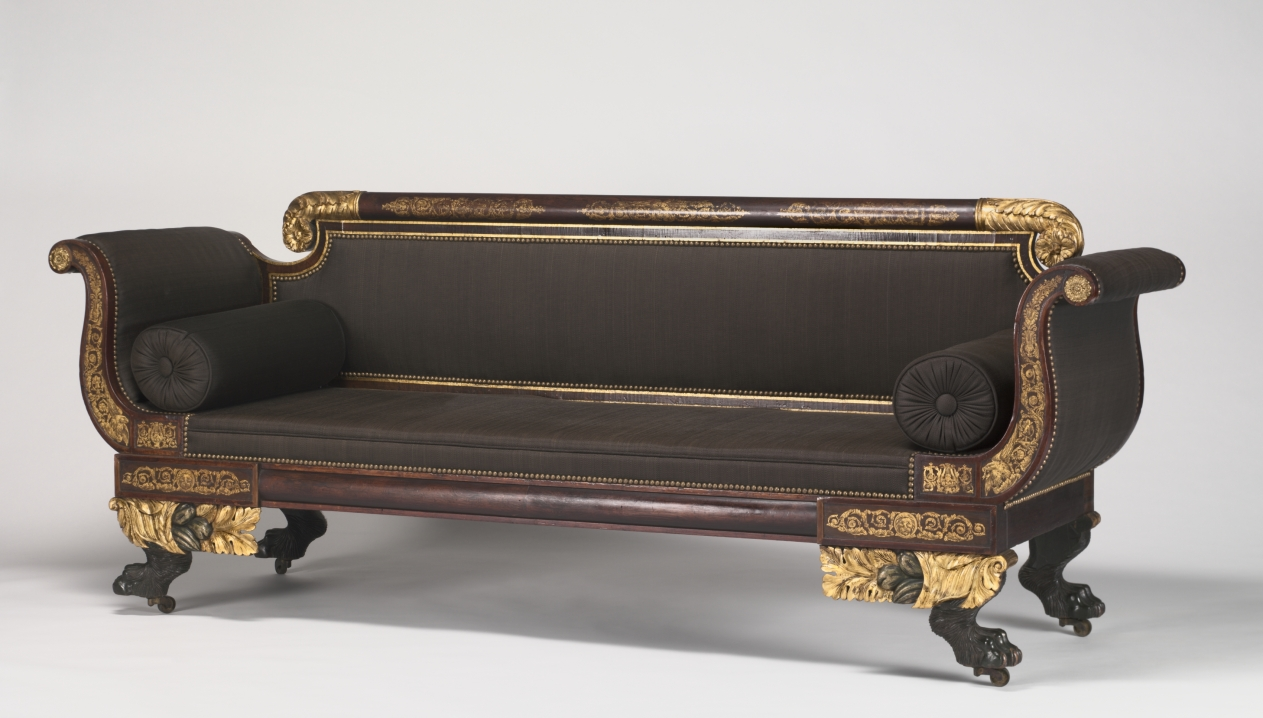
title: Sofa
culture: America, New York, Empire style, 19th century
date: c. 1820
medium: wood with painted and gilded decoration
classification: Furniture and woodwork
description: The classically inspired elements of design such as the scrolled arms and the well executed gilt decoration identifies this sofa as an example of American Empire style furniture almost certainly made in New York City.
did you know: At first glance you might not notice the animals, but look closely and you will discover the small faces of lions and the outstretched wings of eagles that decorate this sofa's frame. Furniture made in the Empire style was adapted from ancient Grecian forms by Parisian and American cabinet makers influenced by the classical style.